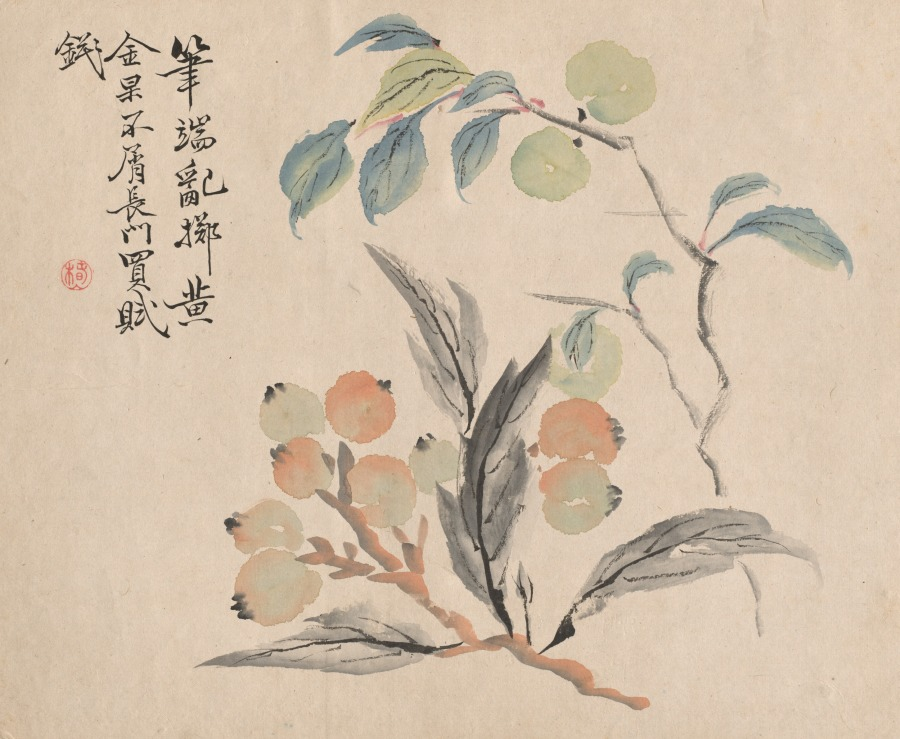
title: Loquat Tree of Japan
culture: Japan, Edo period (1615–1868)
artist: Tsubaki Chinzan (Japanese, 1801–1854)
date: c. 1845–54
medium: Ink and color on paper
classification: Drawing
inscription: Inscription upper left corner.